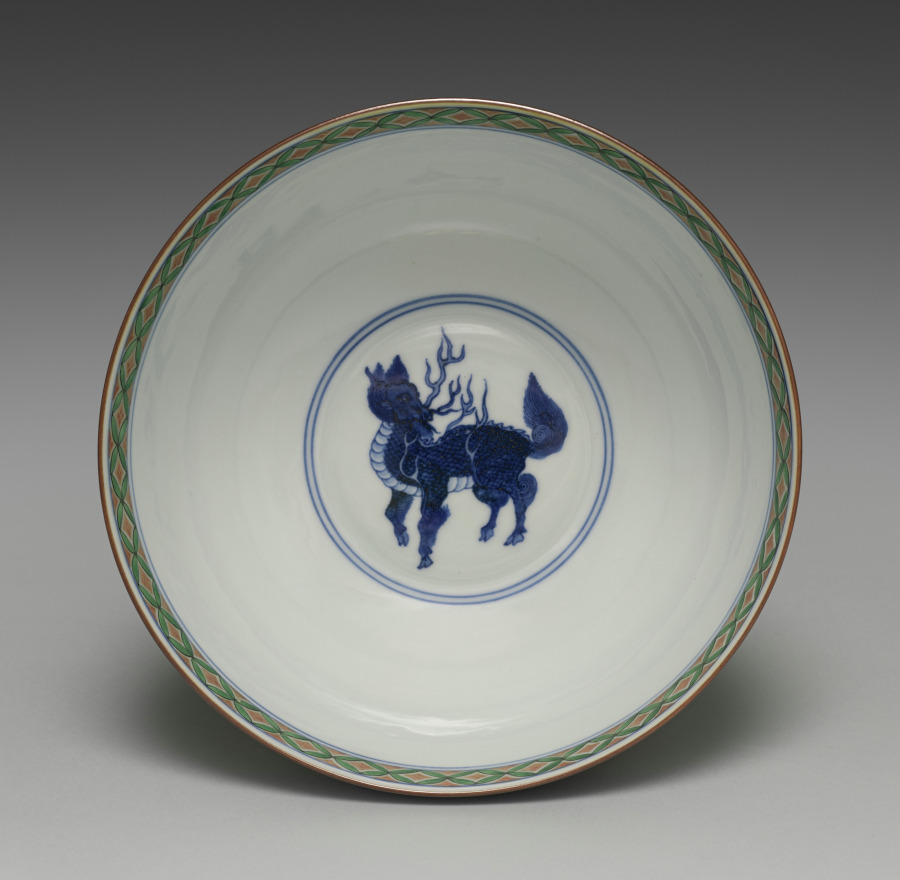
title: Bowl with Numinous Fungi and Kirin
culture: Japan, Meiji period (1868–1912)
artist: Seifū Yohei III (Japanese, 1851–1914)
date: 1893–1900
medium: Porcelain with cobalt blue glaze, overglaze color enamel, and silver painting overlay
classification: Ceramic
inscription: 清風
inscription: 清風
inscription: 帝室技芸員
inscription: 清風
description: The complex design of this bowl is also technically sophisticated in its execution. On the interior, Yohei III has placed a mythical beast called a kirin (Chinese, qilin) within a double-banded circle painted in cobalt blue under the glaze. Around the interior of the mouth, bordered at top and bottom with underglaze blue under a brown iron oxide painted rim, he has painted a continuous coin pattern with a red wash and green color enamels. The pattern is further defined and embellished with black iron outlining the green- and gold-painted diamonds over the diluted red. The inside is otherwise left white. On the exterior, the body has a dark blue glaze and an overlaid silver design of reishi with incised lines for detail.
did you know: Inside the bowl is an auspicious, mythical deerlike creature called kirin in Japanese (麒麟 or qilin in Chinese).